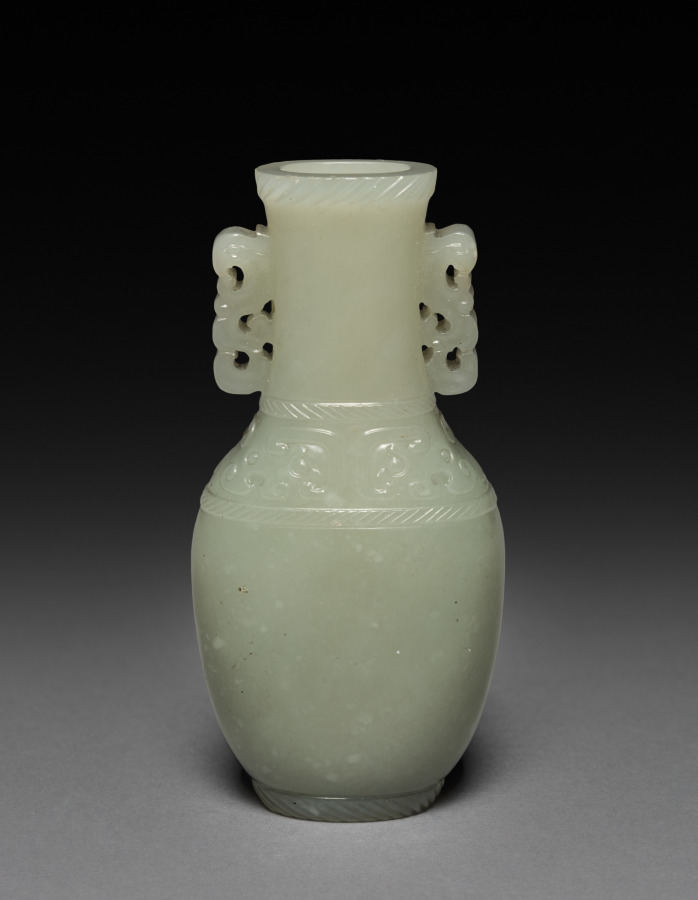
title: Bottle with Stopper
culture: China, Qing dynasty (1644–1911), Qianlong reign (1736–95)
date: 1736–95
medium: jade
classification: Jade